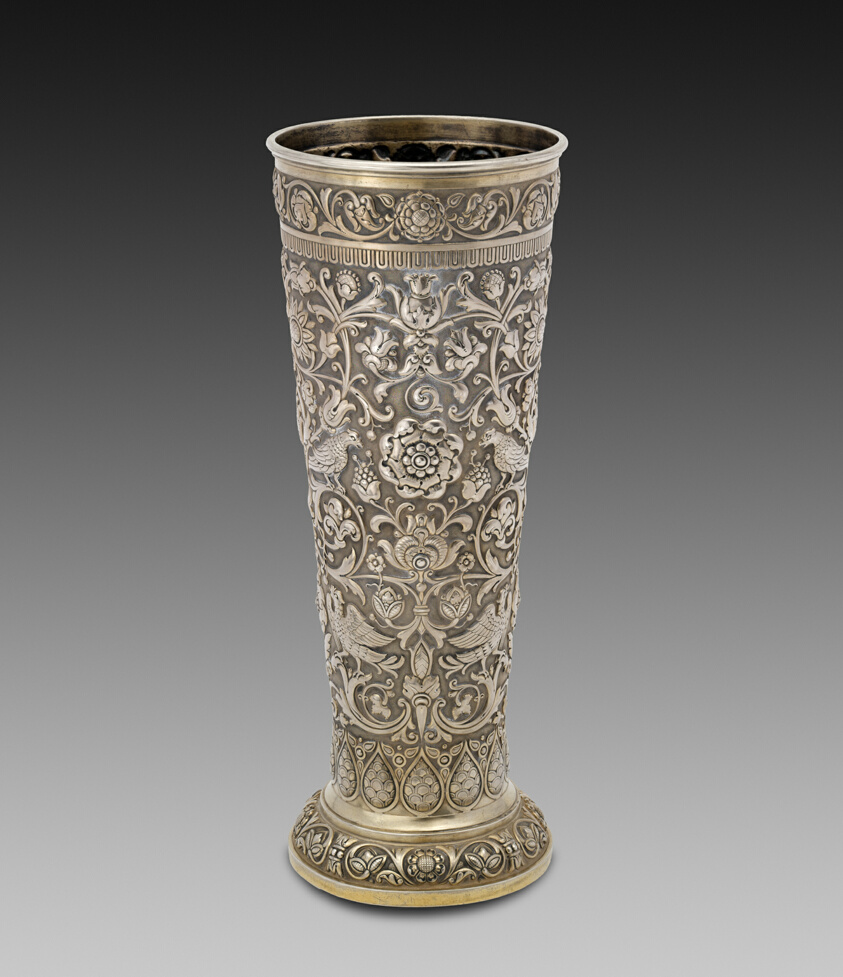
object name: Metalwork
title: Vase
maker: Ovchinnikov Firm; Moscow, 1853-1917; St. Petersburg, 1873-1917; Moscow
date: 1899/1900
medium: Silver gilt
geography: Russia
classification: vase; vessel; decorative arts